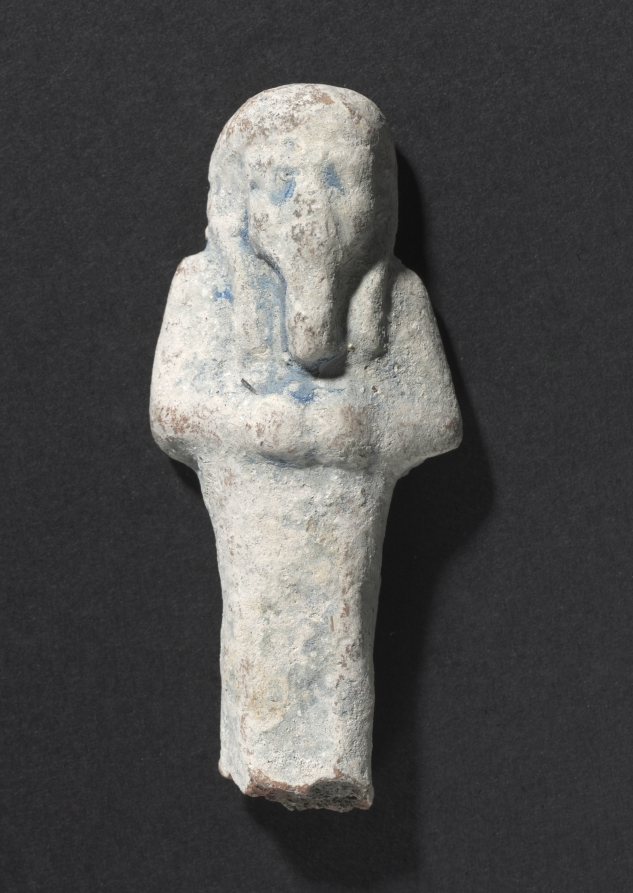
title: Shawabty of Ditamenpaankh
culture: Egypt, Late period (715–332 BCE), Dynasty 25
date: 715–656 BCE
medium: terracotta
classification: Funerary Equipment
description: High demand for shawabtys in the Late Period, a time when as many as 400 or more shawabtys were placed in the tomb with the deceased, gave rise to a specialized container for storing them: the shawabty box. This example is inscribed for the lady of the house, Ditamenpaankh, and was probably one of a pair originally made for her. The single-masted boat on the box's lid is perhaps an allusion to the pilgrimage of the deceased to the holy city of Abydos, the cult city of Osiris, king of the dead. The shawabtys inside are crude, mass-produced examples cast in an open mold. Made of terracotta, their blue paint imitates more costly shawabtys made of faience. As for the shawabty spell, it has been removed from its traditional location on the shawabty's front and relocated onto the sides of box, where it needed only to be written once, thus expediting production.